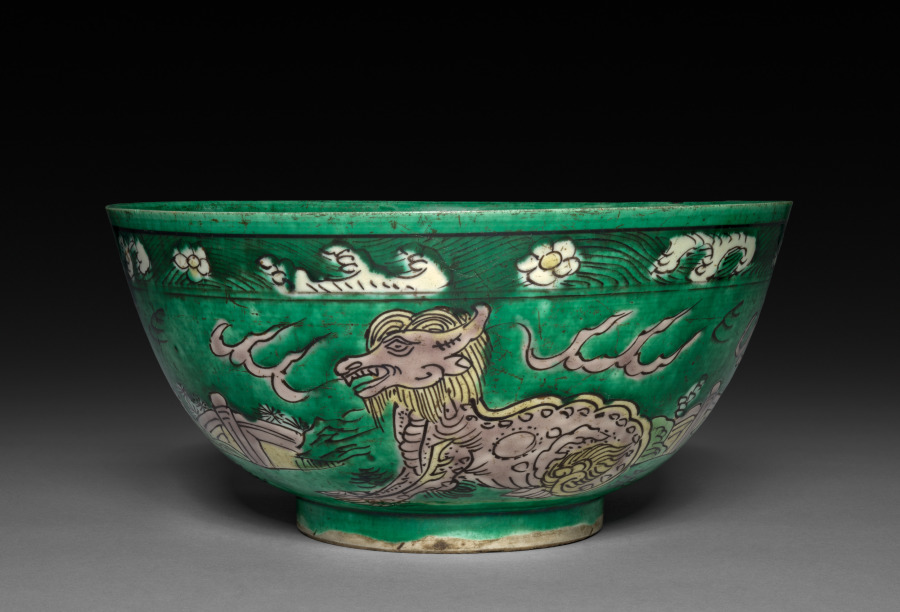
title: Bowl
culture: China, Ming dynasty (1368-1644), Xuande reign (1425-1435)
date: 1426–1435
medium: porcelain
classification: Ceramic